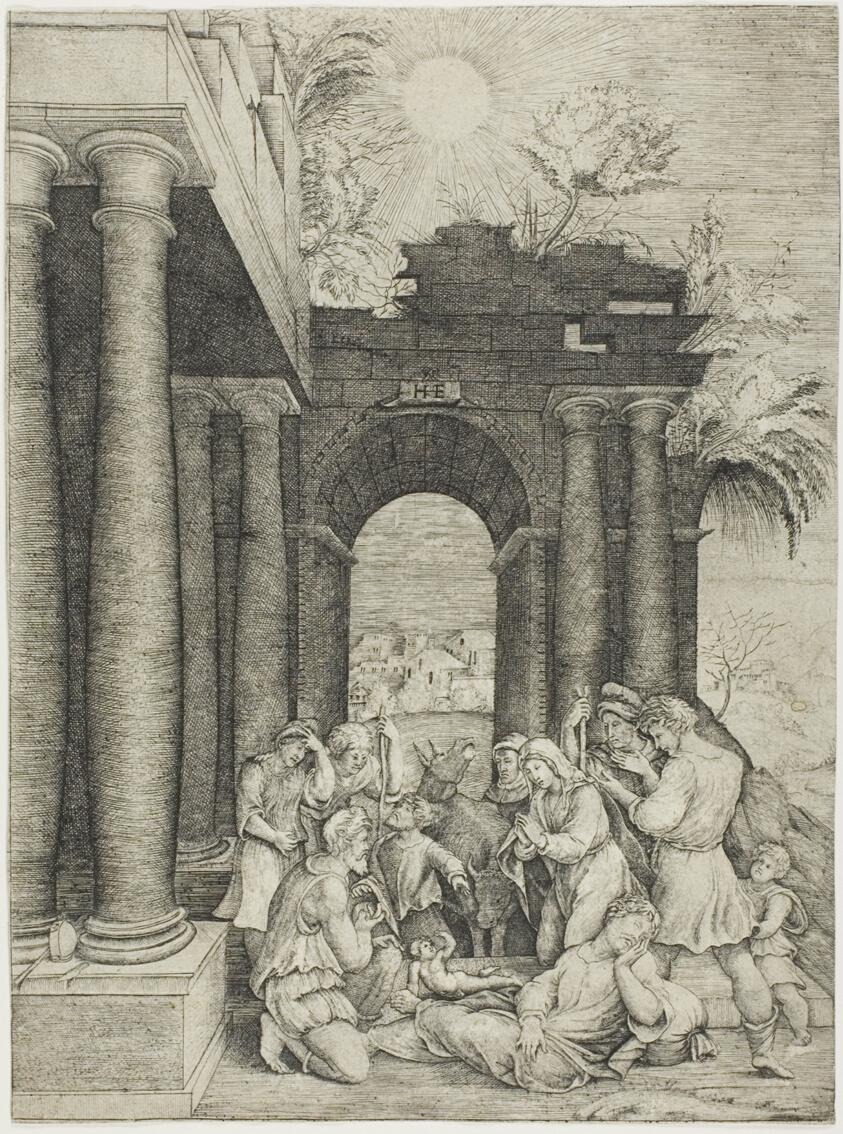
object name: Print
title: The Adoration of the Shepherds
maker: Master HFE; Italian, early 16th century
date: c. 1520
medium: Engraving on paper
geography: Italy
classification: engraving; print; prints and drawing